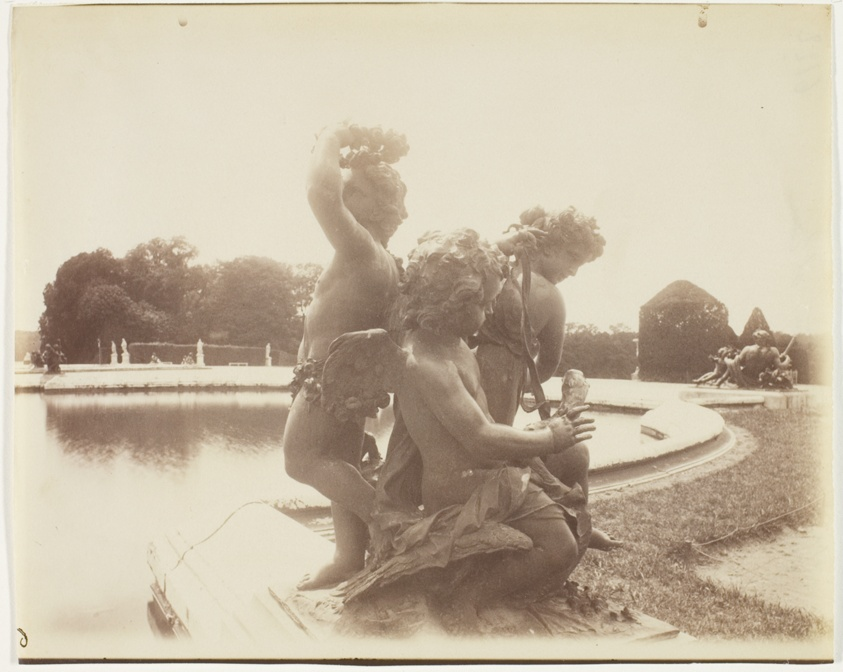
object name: Photograph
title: Versailles, Parterre d' Eau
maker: Jean-Eugène-Auguste Atget (French, 1857–1927)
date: 1901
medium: Albumen print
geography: France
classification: albumen silver print; photographic process; photography; photograph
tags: Collected by Hugh Edwards